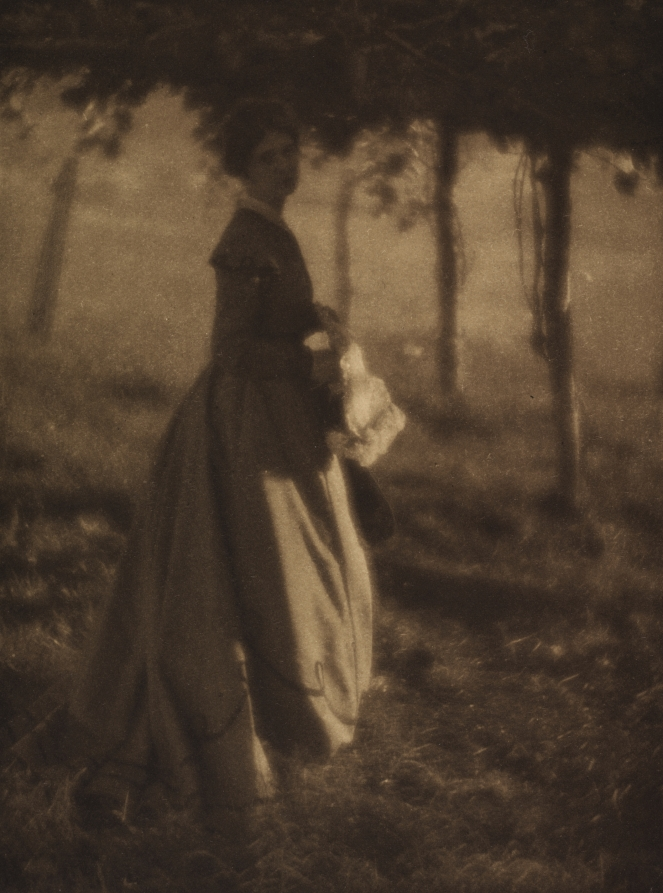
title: The Arbor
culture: America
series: Camera Work, no. 23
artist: Clarence H. White (American, 1871–1925)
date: 1906 (printed 1908)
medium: photogravure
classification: Photograph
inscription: Written in pencil on verso: "31 [circled]"; "Photographed by Clarence H. White / 1906"